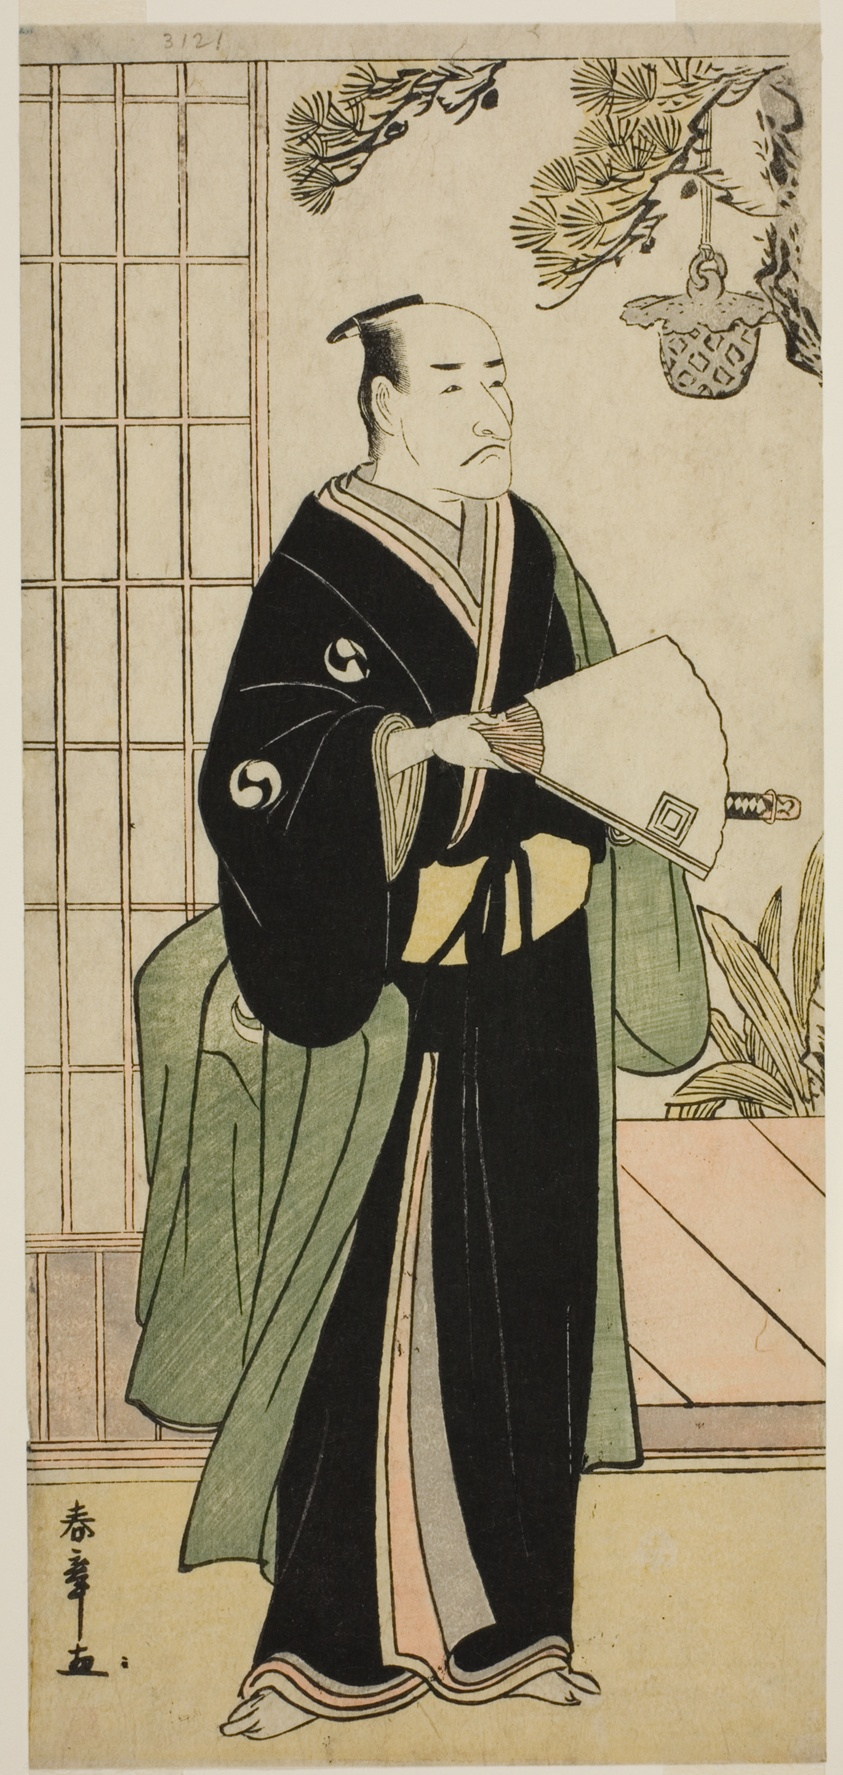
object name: Print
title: The Actor Ichikawa Danjuro V as Oboshi Yuranosuke in the Play Kanadehon Chushingura, Performed at the Nakamura Theater in the Fifth Month, 1783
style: Japanese (culture or style)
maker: Katsukawa Shunsho 勝川 春章; Japanese, 1726-1792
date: c. 1783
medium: Color woodblock print; hosoban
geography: Japan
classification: woodblock print; print; asian art